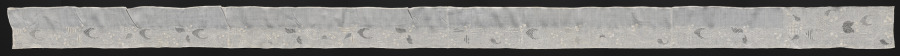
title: Embroidered Band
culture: France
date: 1800s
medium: Plain weave linen: needle lace (cutwork and drawnwork) and embroidery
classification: Embroidery